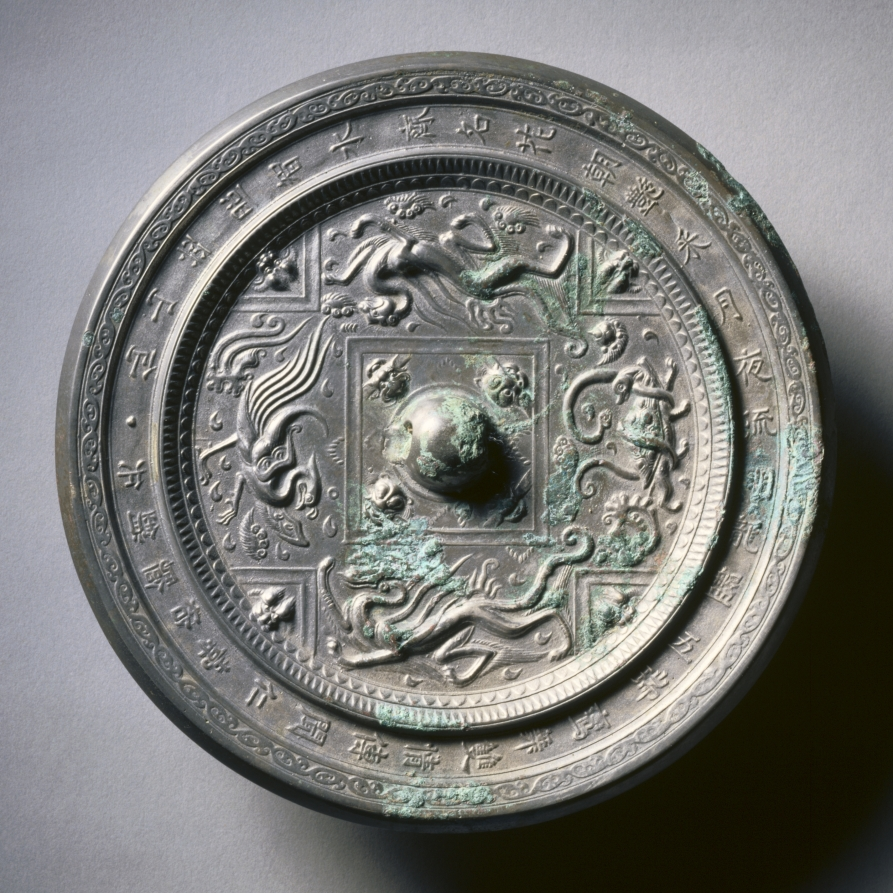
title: Mirror with Four Spirits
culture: China, Sui dynasty (581-618)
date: 581–618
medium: bronze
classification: Metalwork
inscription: The immortal peaks rise as twins./ The wise river now has a rival./ Morning flowers are made bright and charming./ At night, its light reflects the moon./ The dragon coils around the jade disc./ A pair of fabulous birds dance in harmony./ It is said the Renshou era/ Was when the war began to end.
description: Inscription: The immortal peaks rise as twins. The wise river now has a rival. Morning flowers are made bright and charming. At night, its light reflects the moon. The dragon coils around the jade disc. A pair of fabulous birds dance in harmony. It is said the Renshou era Was when the war began to end.